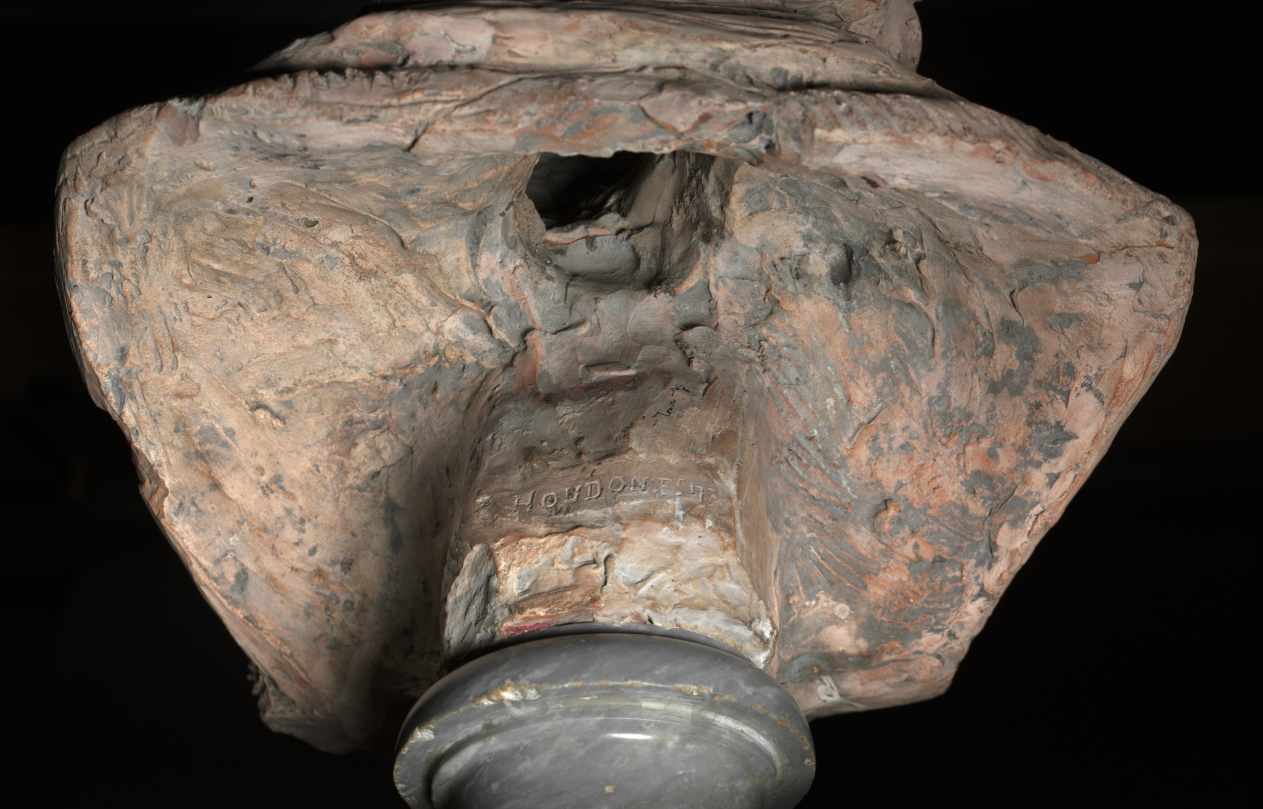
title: Portrait of Christoph Willibald Gluck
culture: France, 18th century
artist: Jean-Antoine Houdon (French, 1741–1828)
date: c. 1775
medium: terracotta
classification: Sculpture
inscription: inscribed in plaster fill in back at bottom: Houdon FT 177[4?]. Since this inscription was clearly added after the terracotta was fired, it cannot be considered a signature.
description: A well-known composer of the 1700s, Gluck reformed opera by bringing unprecedented simplicity and sincerity to his music and staging, qualities shared by Houdon’s bust. This portrait, by depicting Gluck’s pockmarked face, was perceived as a natural and truthful representation. Yet, he would never have appeared publicly with unkempt hair and an open collar, which constituted the standard for representing an artist.